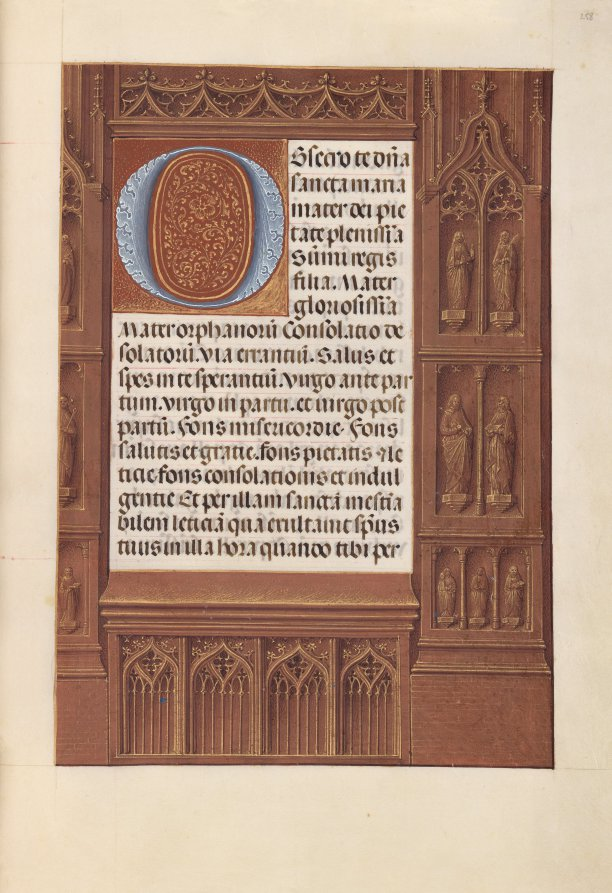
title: Hours of Queen Isabella the Catholic, Queen of Spain: Fol. 258r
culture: Flanders, Ghent and Bruges, late 15th century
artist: Master of the First Prayerbook of Maximillian (Flemish, c. 1444–1519)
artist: and Associates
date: c. 1500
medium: ink, tempera, and gold on vellum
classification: Bound Volume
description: This manuscript was illuminated by a circle of at least five highly organized manuscript painters active in the Flemish cities of Ghent and Bruges. The principal illuminator was Alexander Bening, who painted the majority of the book's miniatures. Manuscripts produced by this circle of artists are renowned for the decoration of their borders, which typically feature a rich variety of realistically-painted flowers, birds, and butterflies. This prayer book, called a book of hours, was intended not for a cleric, but for the private devotions of a lay person-in this case, Isabella the Catholic, Queen of Spain (1451-1504). Isabella's coat of arms embellishes the book's frontispiece. It is unlikely that the book was commissioned by the Queen herself; rather, she probably received it as a diplomatic gift from someone courting her patronage, perhaps Cardinal Francisco Jimenez de Cisneros. A Franciscan friar, Jimenez was dependent upon Isabella for his advancement, first to the post of Queen's confessor in 1492, and then to Archbishop of Toledo in 1495.